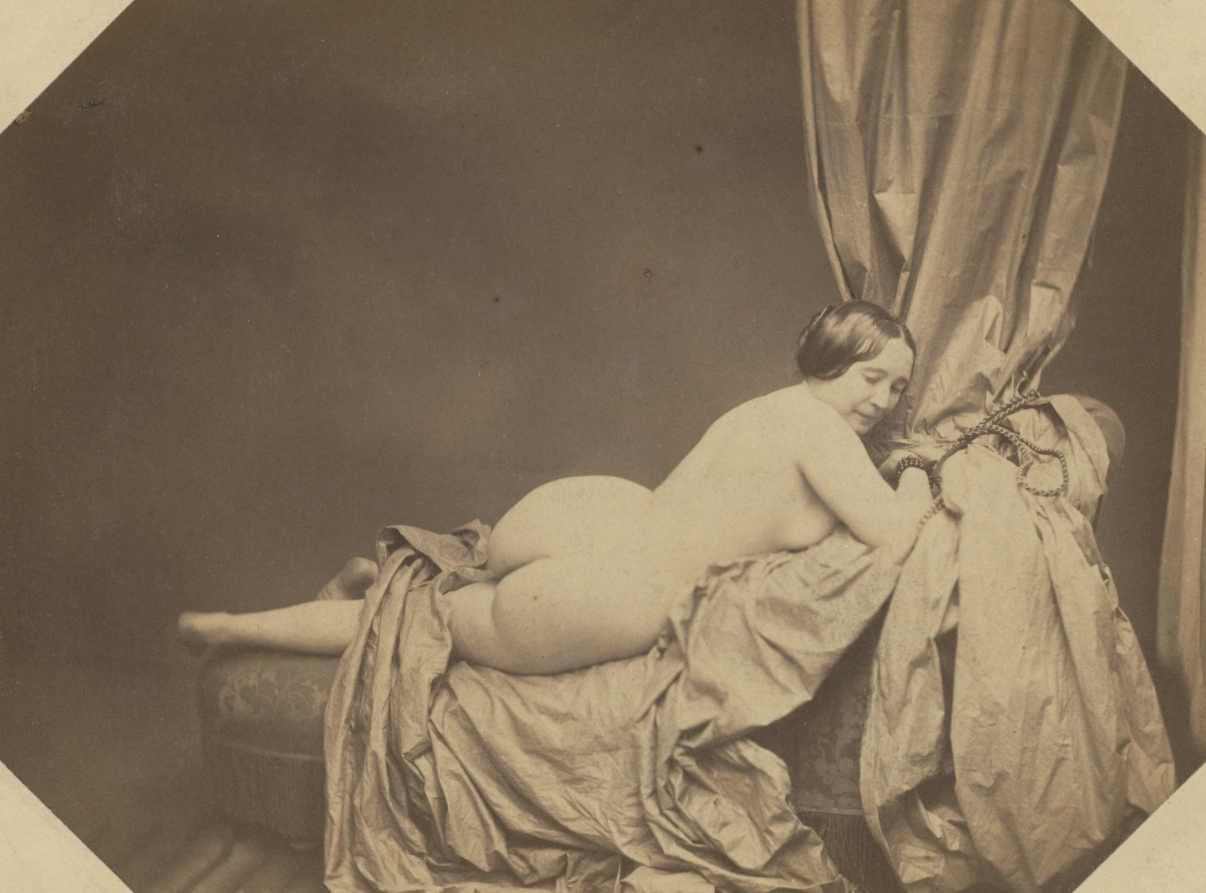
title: Academic Nude, Reclining on a Sofa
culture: France, 19th century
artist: Auguste Belloc (French, 1801-c. 1868)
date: c. 1855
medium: salted paper print from wet collodion negative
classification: Photograph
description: Before becoming a photographer and writer on photographic theory, processes, and techniques, Belloc produced watercolors and miniatures. By 1851, he had established a commercial studio in Paris, specializing in portraiture and nude studies. In this example, he carefully positioned his model with favorite props, such as a chaise longue and copious amounts of rich drapery. Natural illumination in the skylit studio clearly defines her sensuous body with bright highlights and rich shadows. The luxurious flesh tones and the suggestive pose add to the picture's eroticism. Shown in exhibitions and purchased by wealthy voyeurs, Belloc's images of nudes were also sought by painters wanting to avoid the expense of a live model.